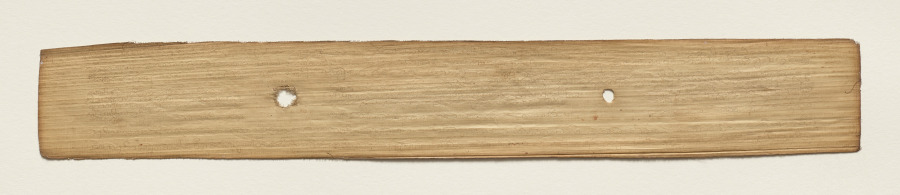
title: Leaf from a Buddhist Manuscript (verso)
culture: Sri Lanka, Singhalese, Late 17th century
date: c. 1700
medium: fiber paper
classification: Manuscript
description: Palm leaf material is still used for manuscripts in Sri Lanka. The palm leaves are prepared first by boiling them, drying them in the sun, and then rubbing them with oils. Scribes then use a metal stylus to incise the text. Then charcoal powder is wiped across the pages, filling in only the inscribed lines.